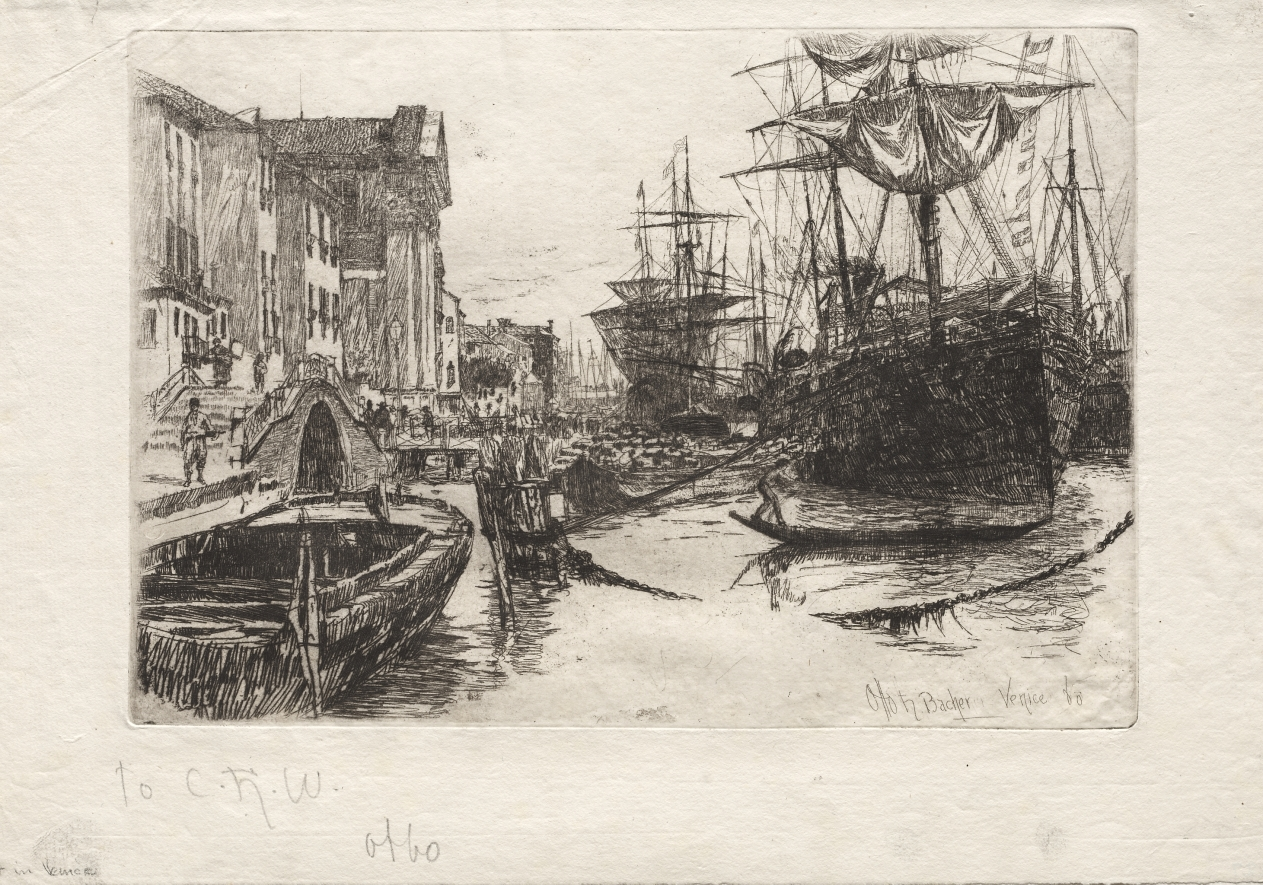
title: View in Venice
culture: America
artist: Otto H. Bacher (American, 1856–1909)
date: 1880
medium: etching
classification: Print